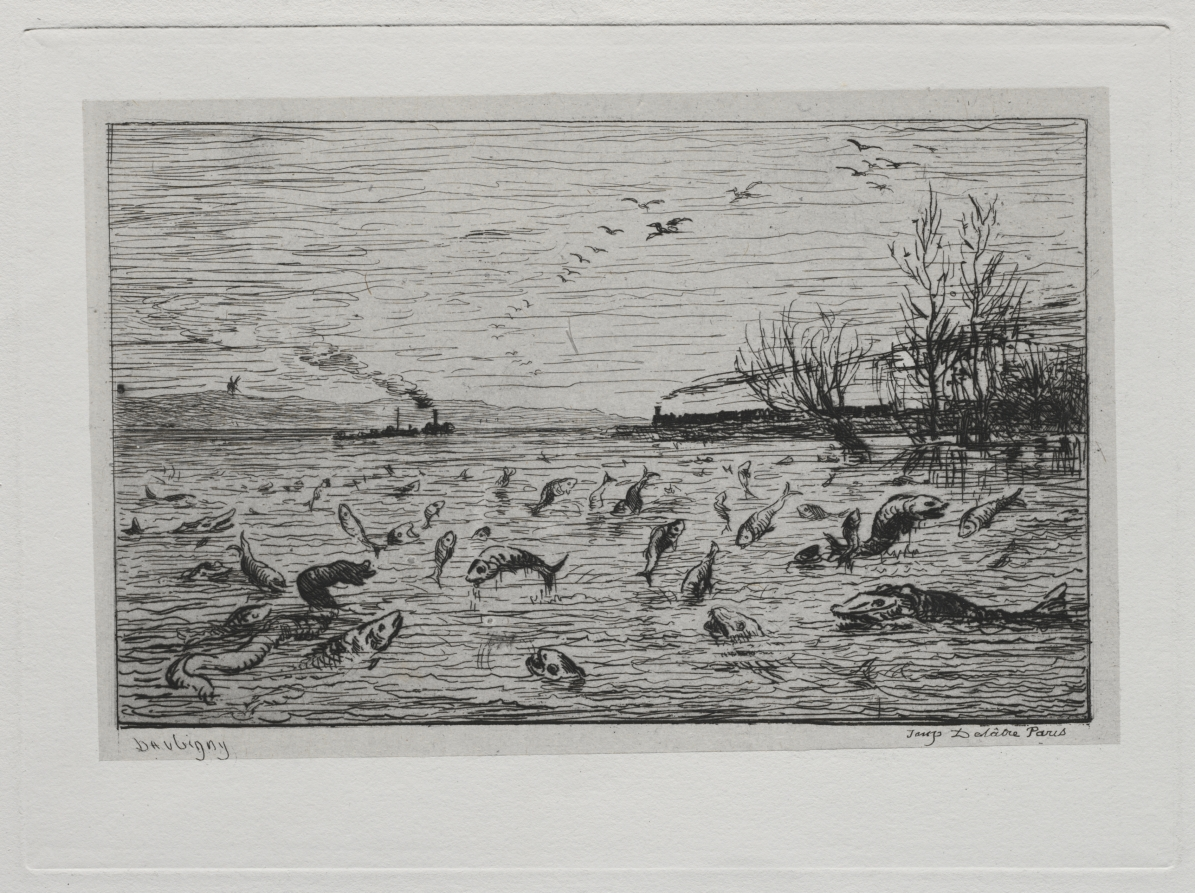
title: The Boat Trip: Rejoicing of the Fish at the Departure of the Cabin Boy (The Fish)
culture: France, 19th century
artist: Charles François Daubigny (French, 1817–1878)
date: 1861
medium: etching with chine collé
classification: Portfolio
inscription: lower left corner, in graphite: L. D. 114